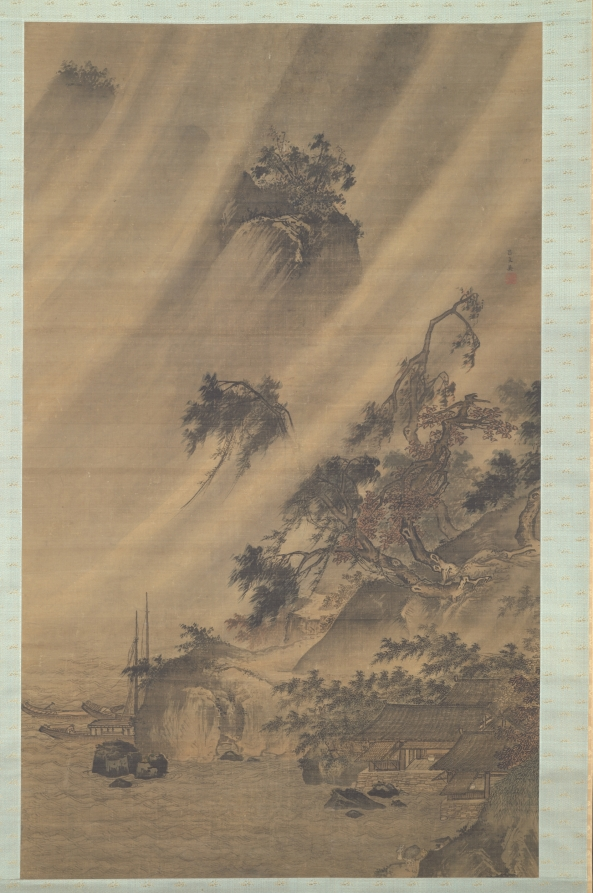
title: River Village in a Rainstorm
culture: China, Ming dynasty (1368–1644)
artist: Lu Wenying (Chinese)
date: c. 1480–1507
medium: Hanging scroll; ink and slight color on silk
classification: Painting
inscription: 呂文英 [印] 日近清光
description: In this scene, windswept rain pelting a village captures the power of nature in a masterful composition. Lü Wenying from Zhejiang served as a court painter during the Hongzhi era (1488–1505). Hardly known, with few remaining works, he is considered a Zhe school painter who followed the style of the Southern Song academy. Zhe school painters, named after the province of Zhejiang, transformed the poetic scenery of the Southern Song artists into dramatic, large-scale views. Active in the same region with frequent monsoon rains in the summer season, artists were familiar with outbreaks of rain and storms.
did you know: A young boy peeks out a window perhaps viewing the two people struggling through the rain.